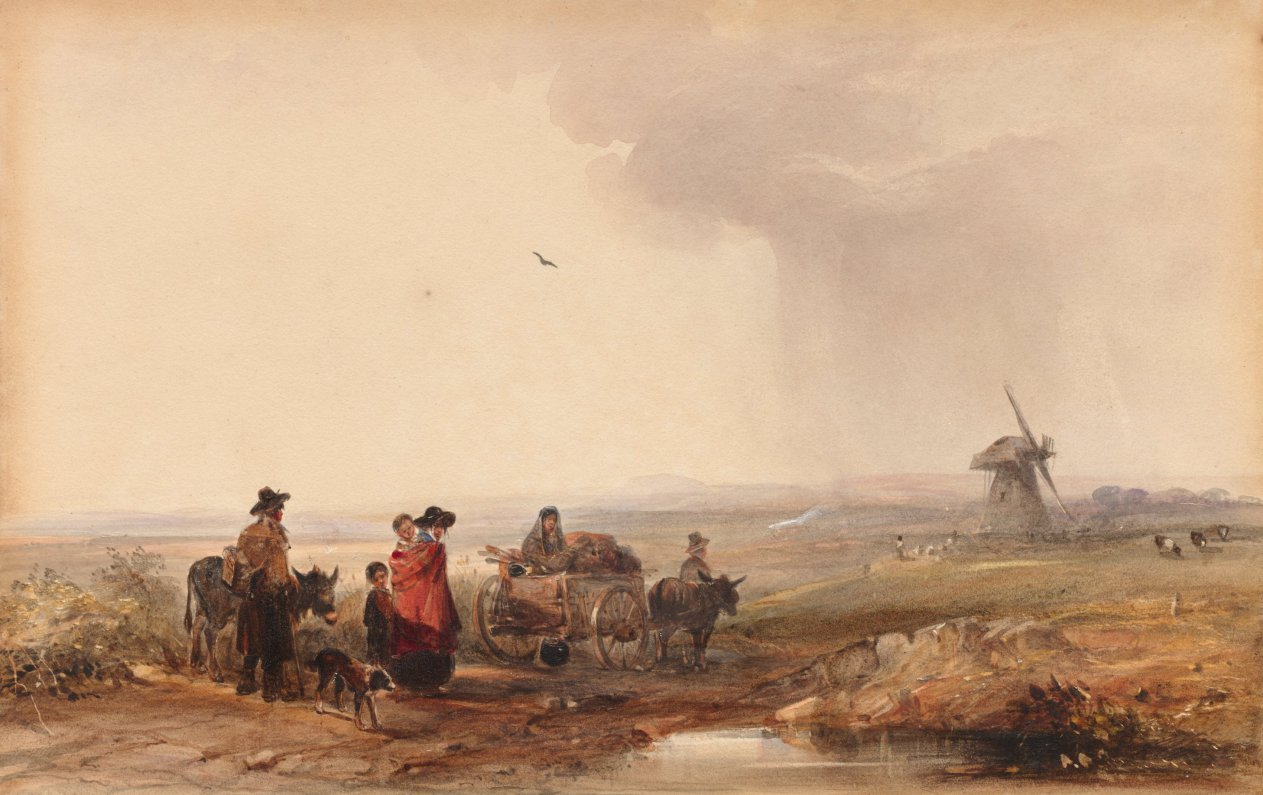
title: Gypsy Camp, Holland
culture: England, 19th century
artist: George Bryant Campion (British, 1795–1870)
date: 1800s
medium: watercolor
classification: Drawing